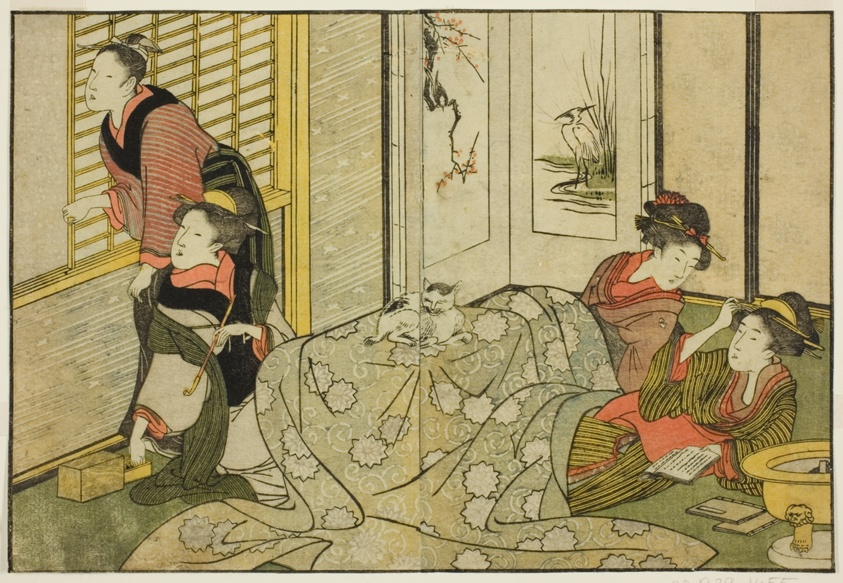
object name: Print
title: Interior Scene on a Snowy Day, from the illustrated book "Picture Book: Flowers of the Four Seasons (Ehon shiki no hana)," vol. 2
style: Japanese (culture or style)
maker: Kitagawa Utamaro 喜多川 歌麿; Japanese, 1753 (?)-1806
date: New Year, 1801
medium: Color woodblock print; double-page illustration from book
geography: Japan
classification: woodblock print; print; asian art